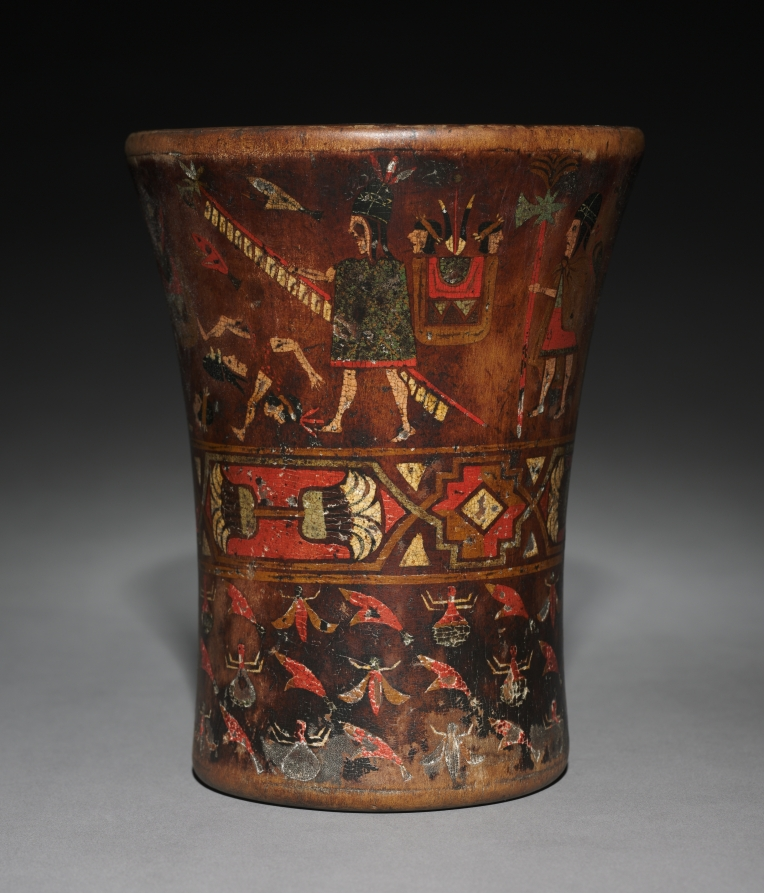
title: Kero (Waisted Cup)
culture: Peru, Colonial Inka style, 16th century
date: after 1550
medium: wood, inlaid pigments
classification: Wood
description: Keros, used to drink the maize beer chicha, were essential items of Inka statecraft. Made and used in pairs, they reflect the important Andean concept of reciprocity. Native use of keros continued in the colonial period, the date of these two examples, which come from separate pairs. The example with geometric motifs is closest to pre-conquest models. On the second, two armies converge: the Inka, dressed in tunics with waistbands, and their opponents, perhaps jungle people whose body parts are heaped in a centerpiece.